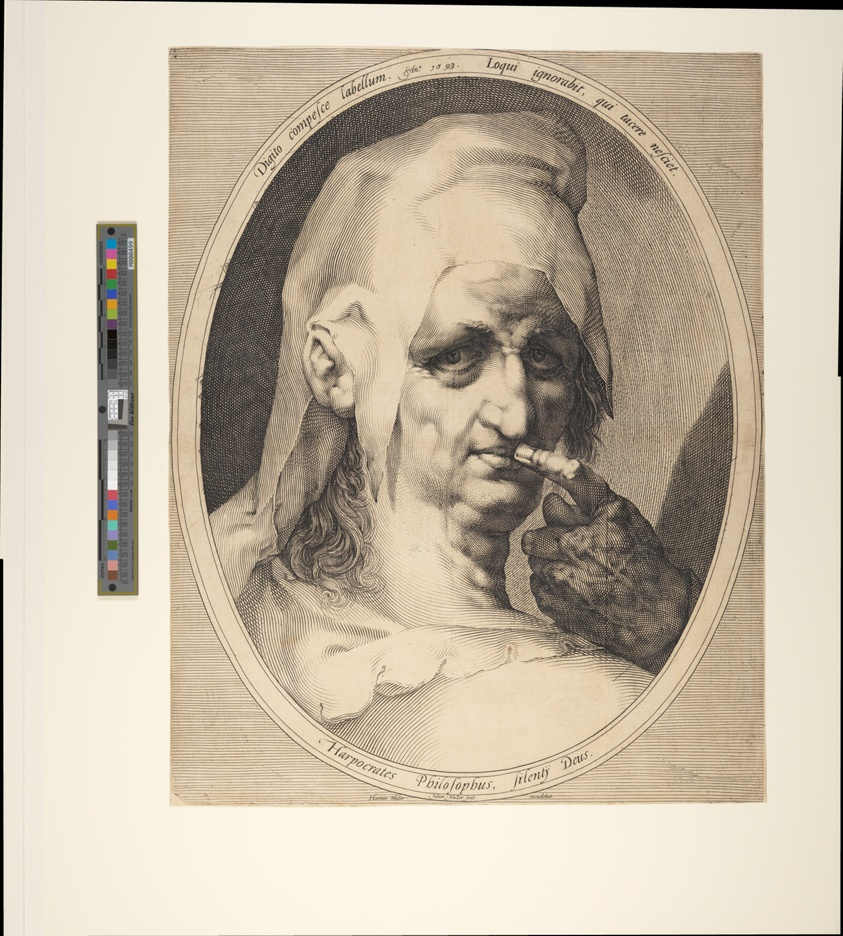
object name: Print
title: Harpocrates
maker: Jan Harmensz Muller; Dutch, 1571–1628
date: 1593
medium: Engraving on ivory laid paper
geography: Netherlands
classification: engraving; paper; print; prints and drawing